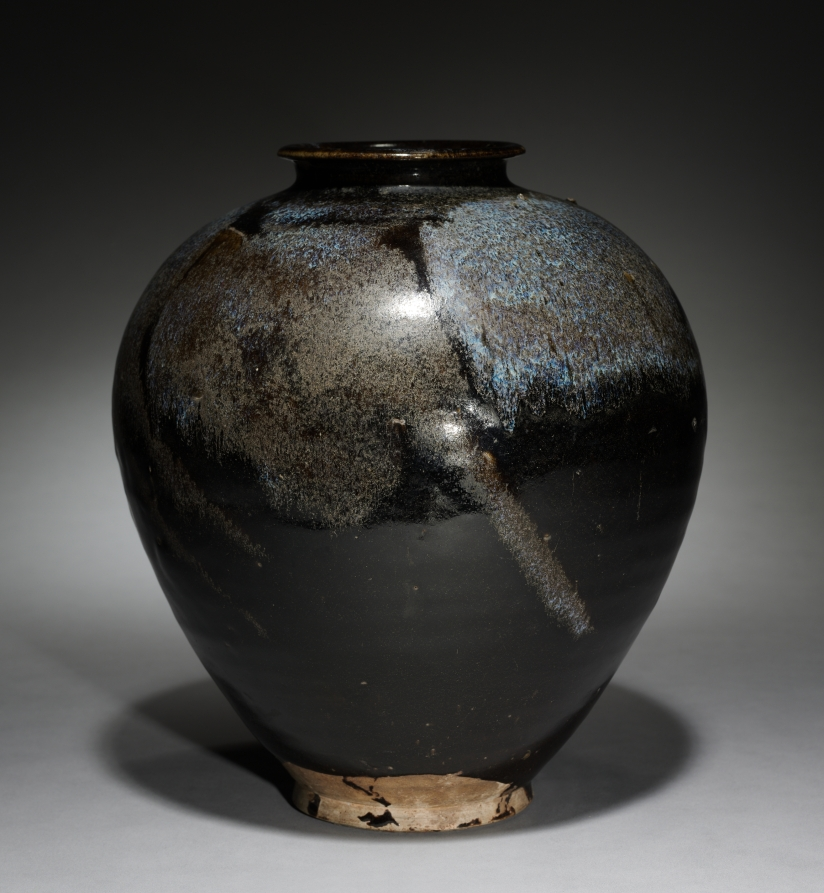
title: Jar: Black Ware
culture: China, Henan province, Huangdao kilns, Tang dynasty (618-907)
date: 700s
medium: glazed stoneware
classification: Ceramic